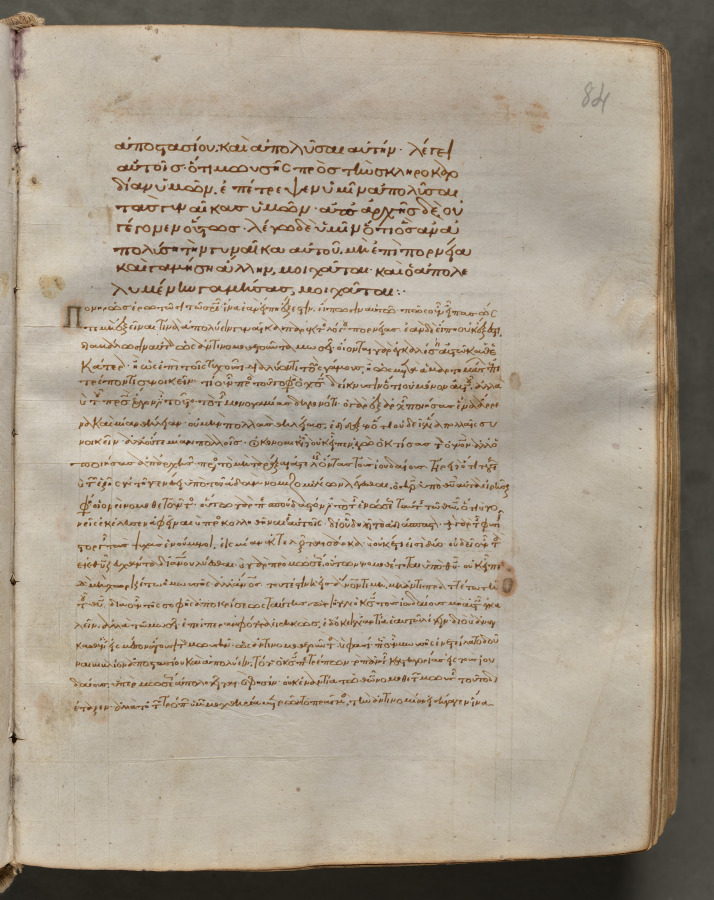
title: Text, folio 84 (recto), from a Gospel Book with Commentaries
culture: Byzantium, Constantinople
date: c. 1000–1100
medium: ink, tempera, and gold on vellum; leather binding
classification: Bound Volume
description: Each of the four gospels in this book opens on a page with brilliantly illuminated borders depicting the author of the text as well as birds-principally peacocks, symbols of the immortality of the soul-and fountains, representing the fountain of life and the salvation of the soul. This volume consists of 428 leaves with texts in Greek. Its level of sophistication suggests that it was probably written and decorated in a monastery in Constantinople.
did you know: Gospel Books were carried in procession through Byzantine churches.